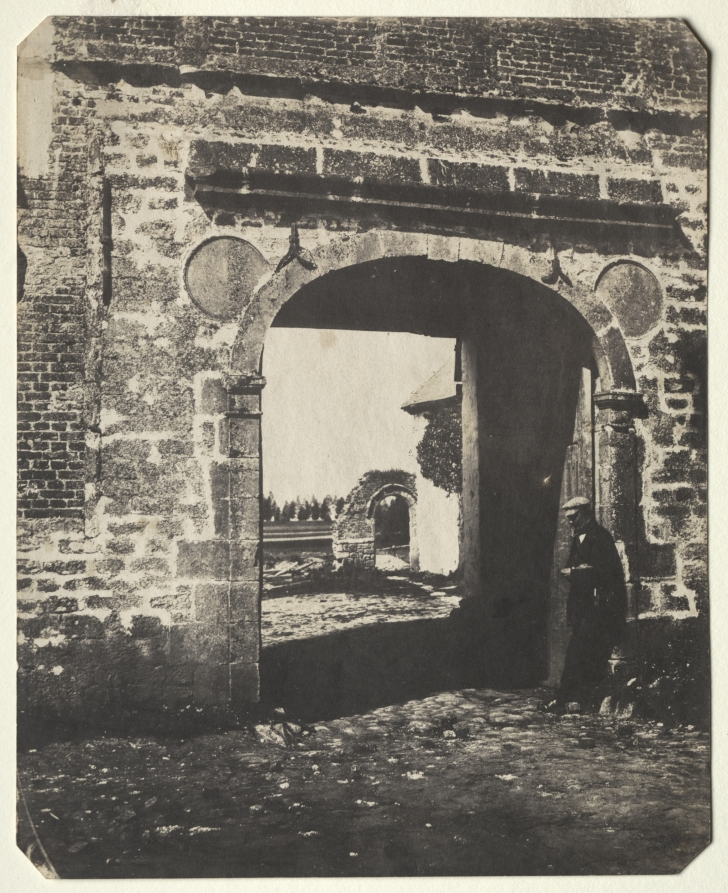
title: Arch in Farmyard, Swansea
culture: England, 19th century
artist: Calvert Richard Jones (British, 1804–1877)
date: 1845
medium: salted paper print from calotype negative, gold-toned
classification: Photograph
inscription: Written in pencil on verso: "10726-CIWS"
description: Educated as a mathematician, musician, and clergyman, Jones was an accomplished daguerreotypist before he was introduced to the calotype by William Henry Fox Talbot in 1845. Jones's pictures were taken primarily in Wales, England, Ireland, and the Mediterranean and often depicted complex compositions of ruins, landscape, and rustic architecture. To provide a sense of scale and human presence, he almost always included figures in his architectural views (here a lone individual leans against the archway). In this photograph Jones also alluded to the inevitable passage of time by contrasting the monumental arch in the foreground with the ruined arch in the distance.